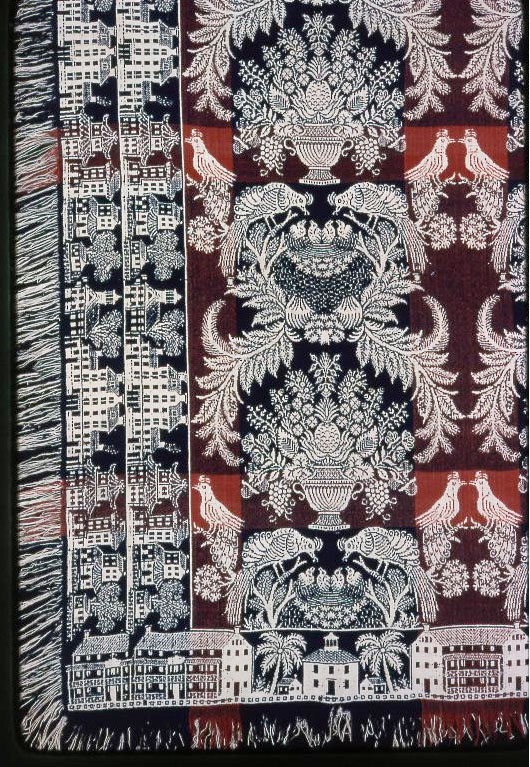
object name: Textile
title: Coverlet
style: 19th century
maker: United States, Ohio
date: 1840/45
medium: Cotton and wool, plain weave double cloth; warp and weft fringe; woven on loom with Jacquard attachment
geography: United States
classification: weaving - coverlet; coverlet; textile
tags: birds, foliage, flowers, trees, buildings, babies, bird, boston, houses, nest, urns, vase, coverlet